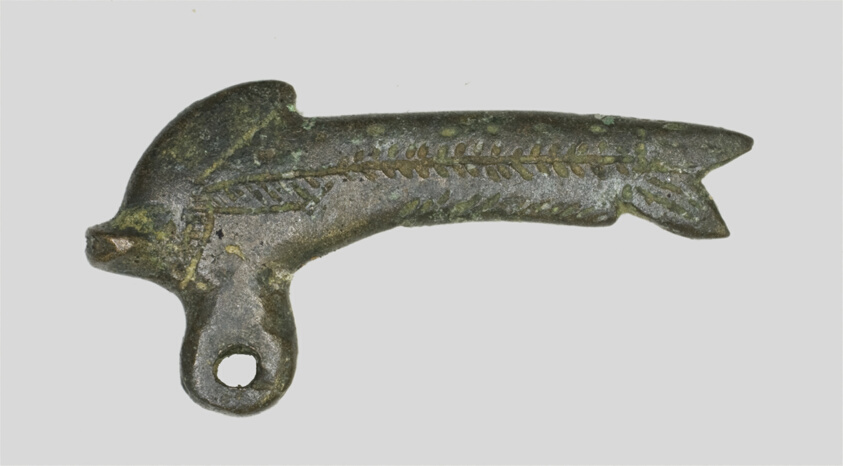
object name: Costume and Accessories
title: Amulet of a Shilbe Fish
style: egyptian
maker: Egyptian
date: Late Period, Dynasty 26–31 (664–332 BCE)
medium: Bronze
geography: Egypt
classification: amulet; jewelry; bronze; metal; ancient art; costume